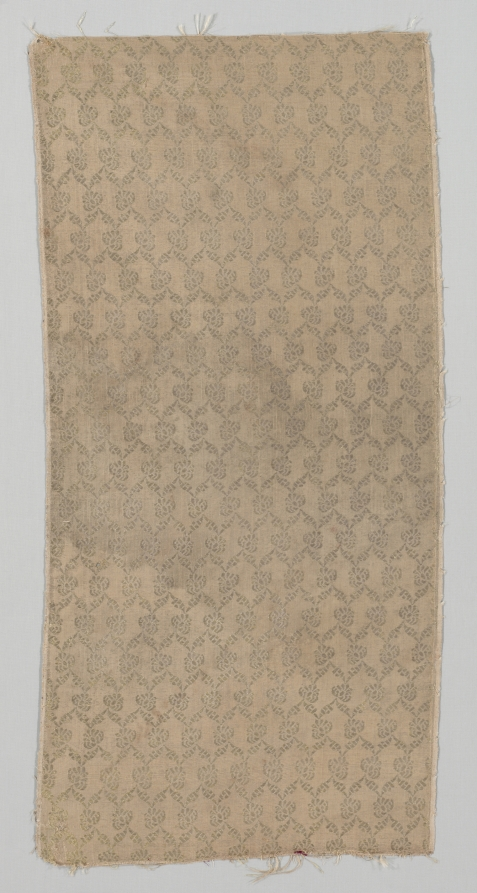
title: Length of Textile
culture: Italy, 17th century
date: 1600s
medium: plain cloth, brocaded; silk and metal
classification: Textile